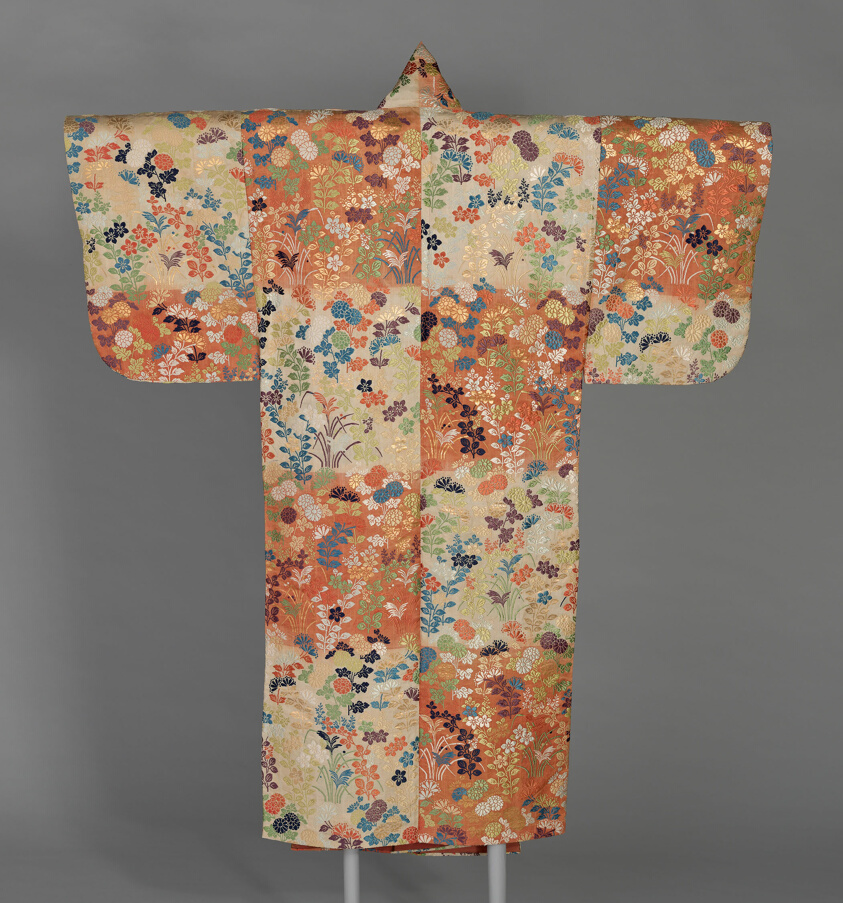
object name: Textile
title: Karaori (Noh Costume)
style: edo (japanese period), asian, middle edo, late edo, Japanism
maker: Japan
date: 18th century, Edo period (1615–1868)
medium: Silk and gold-leaf-over-lacquered-paper strips, twill weave; lined with silk; plain weave; dyed with beni, safflower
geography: Japan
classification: textile; weaving - printed; costume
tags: autumn, flowers, chrysanthemums